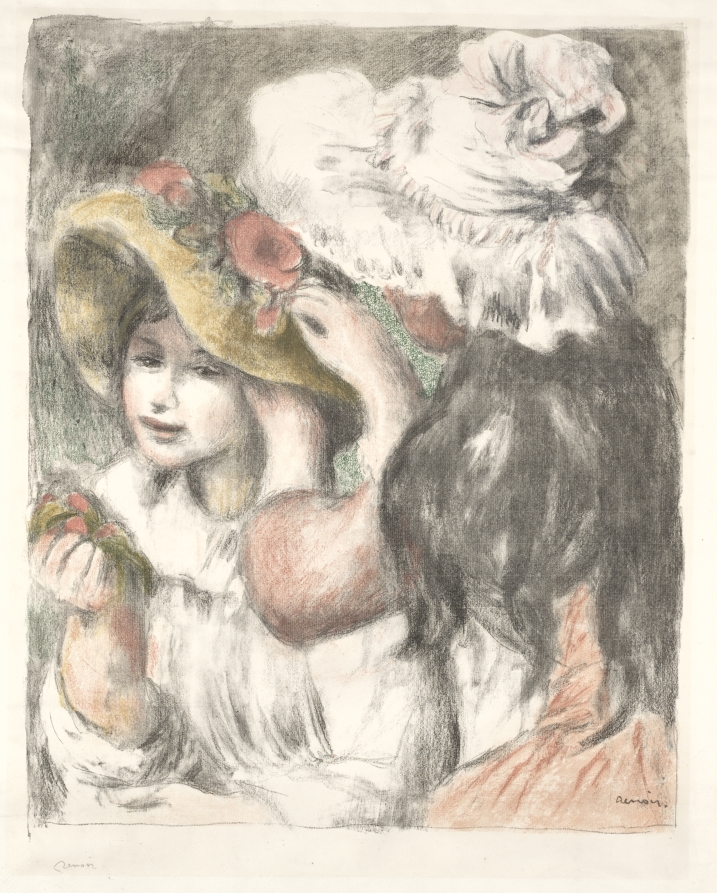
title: Pinning the Hat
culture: France, 19th century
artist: Pierre-Auguste Renoir (French, 1841–1919)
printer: Auguste Clot (French, 1858–1936)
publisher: Ambroise Vollard (French, 1867–1939)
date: 1898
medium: color lithograph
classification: Print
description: Pinning the Hat was a favorite subject for Auguste Renoir, and several versions exist including an 1893 painting and later variations in pastel, etching, and lithography. Renoir's models were Julie Morisot (daughter of Impressionist painter Berthe Morisot [1841-1895]) and her cousin. To produce the range of colors in this print, Renoir worked with the master printer Auguste Clot. The artist drew a design on a lithographic stone and then colored a proof impression as guidance for Clot, who then printed each tone separately.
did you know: Auguste Clot, the master printer of this lithograph, worked with many of the artists of Auguste Renoir's time, including Edgar Degas and Pierre Bonnard.